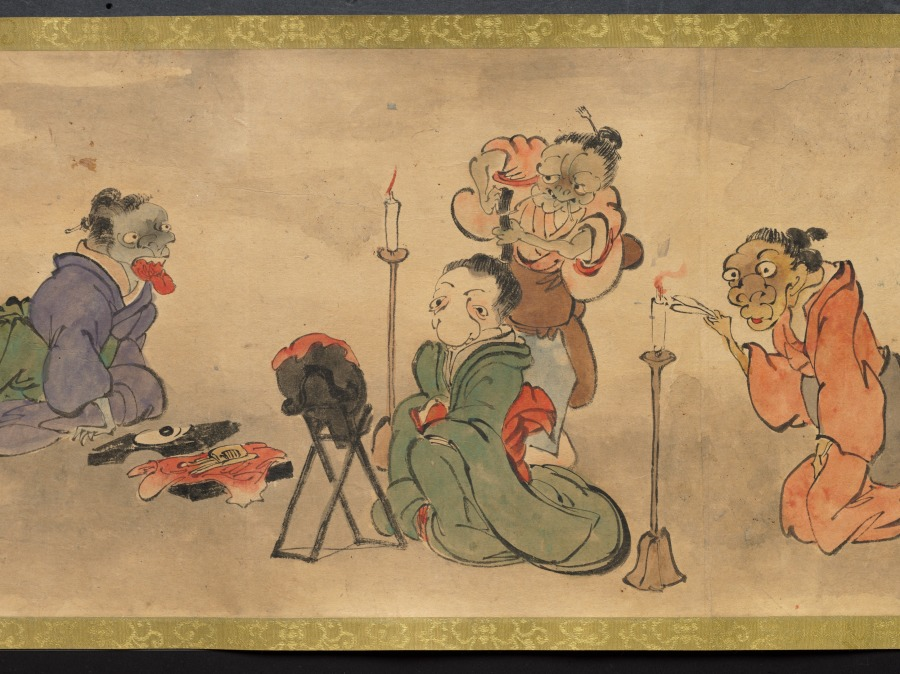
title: An Illustrated Marriage of Apparitions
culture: Japan, Edo period (1615–1868)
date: mid-1800s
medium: handscroll; ink and color on paper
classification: Painting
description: The matchmaking, engagement, wedding, and birth of the first child of two apparitions, or bakemono, literally "things that change," are illustrated in this whimsical, humorous handscroll. Japanese folklore abounds with such strange creatures, most famously represented in handscrolls featuring a procession of 100 supernatural monsters. Aside from a textual preface and cartouches indicating the content of the scenes, the tale is told visually. The artist and whereabouts of the original handscroll are unknown, but a number of other 19th-century copies by amateur painters exist in Japanese collections, attesting to its broad appeal.